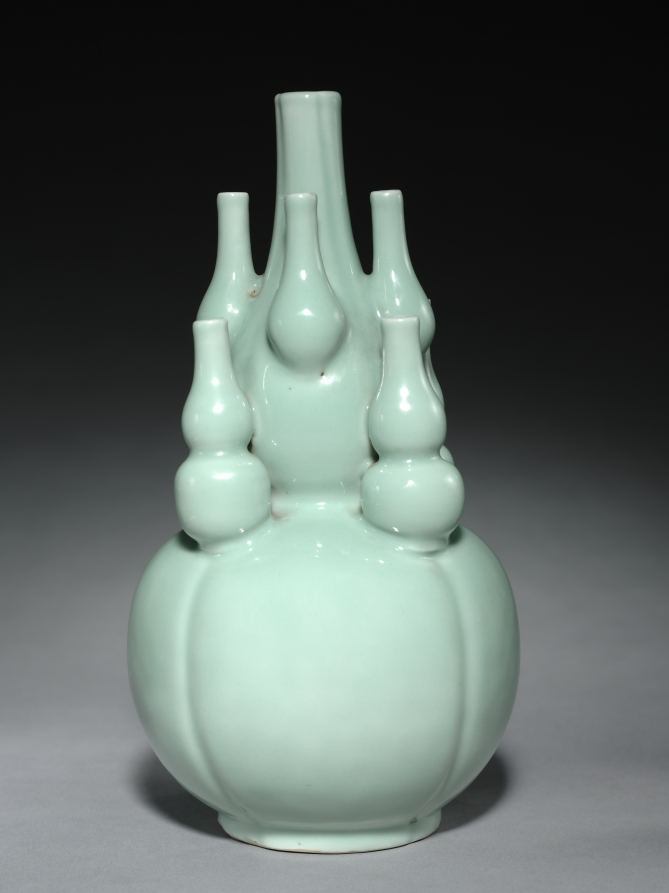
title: Double-gourd Shaped Bottle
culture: China, Qing dynasty (1644–1911), Qianlong mark and reign (1736–95)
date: 1736–95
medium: porcelain with celadon glaze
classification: Ceramic